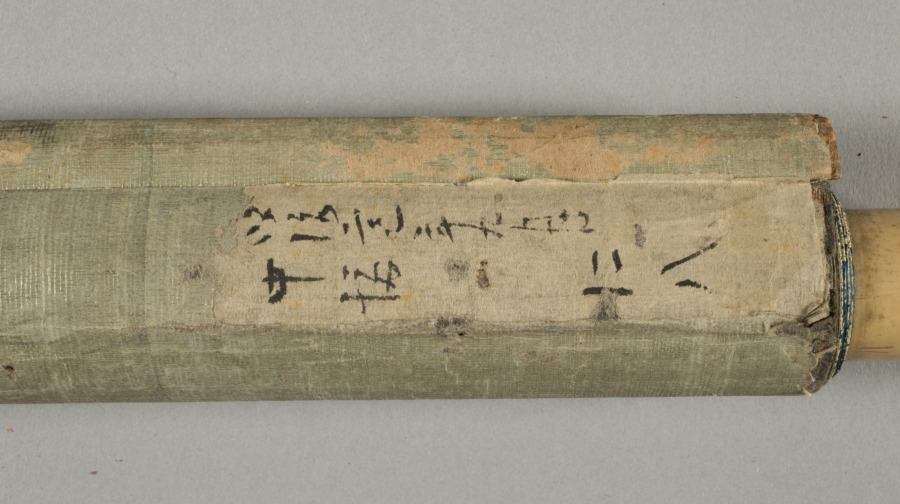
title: Ducks and Reeds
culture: Japan, Momoyama period (1573-1615) to Edo period (1615-1858)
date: early 1600s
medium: hanging scroll; ink on paper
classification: Painting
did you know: This painting was produced by a member of the Kano school.